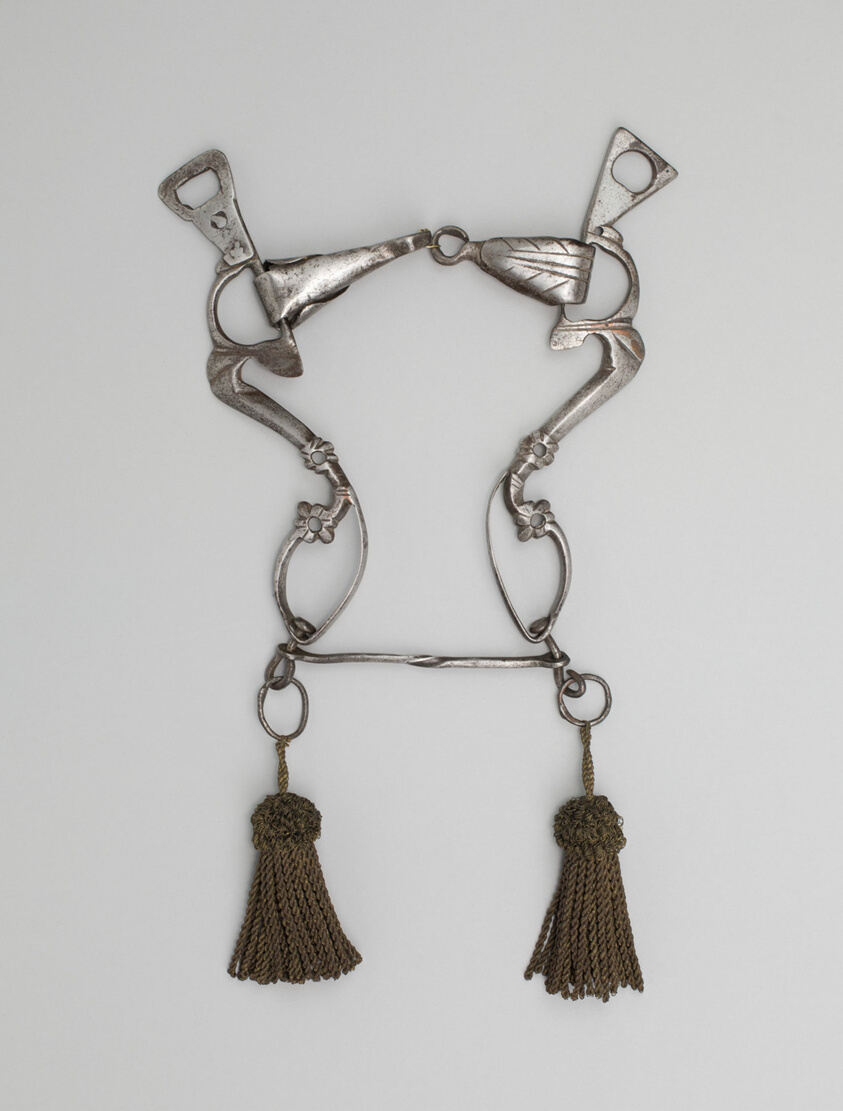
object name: Armor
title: Curb Bit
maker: European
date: 16th century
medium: Steel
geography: Europe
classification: horse equipment; armor; arms and armor